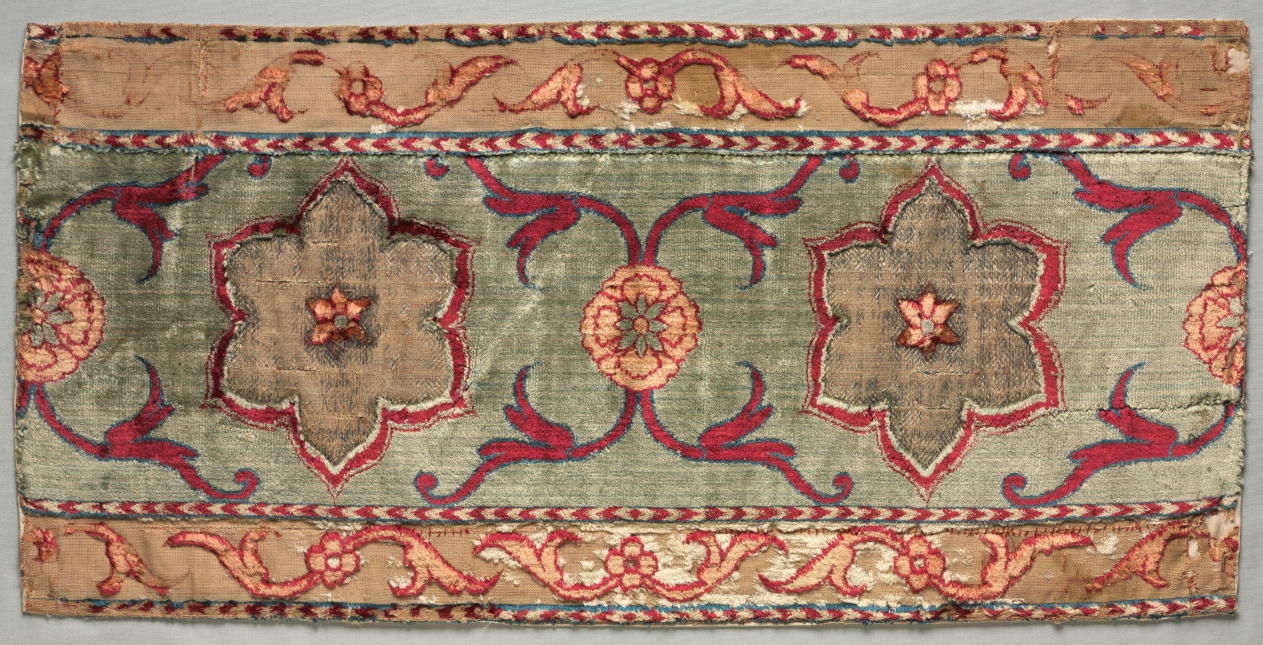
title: Fragment of Border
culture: India, 17th century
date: 1600s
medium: velvet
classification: Velvet